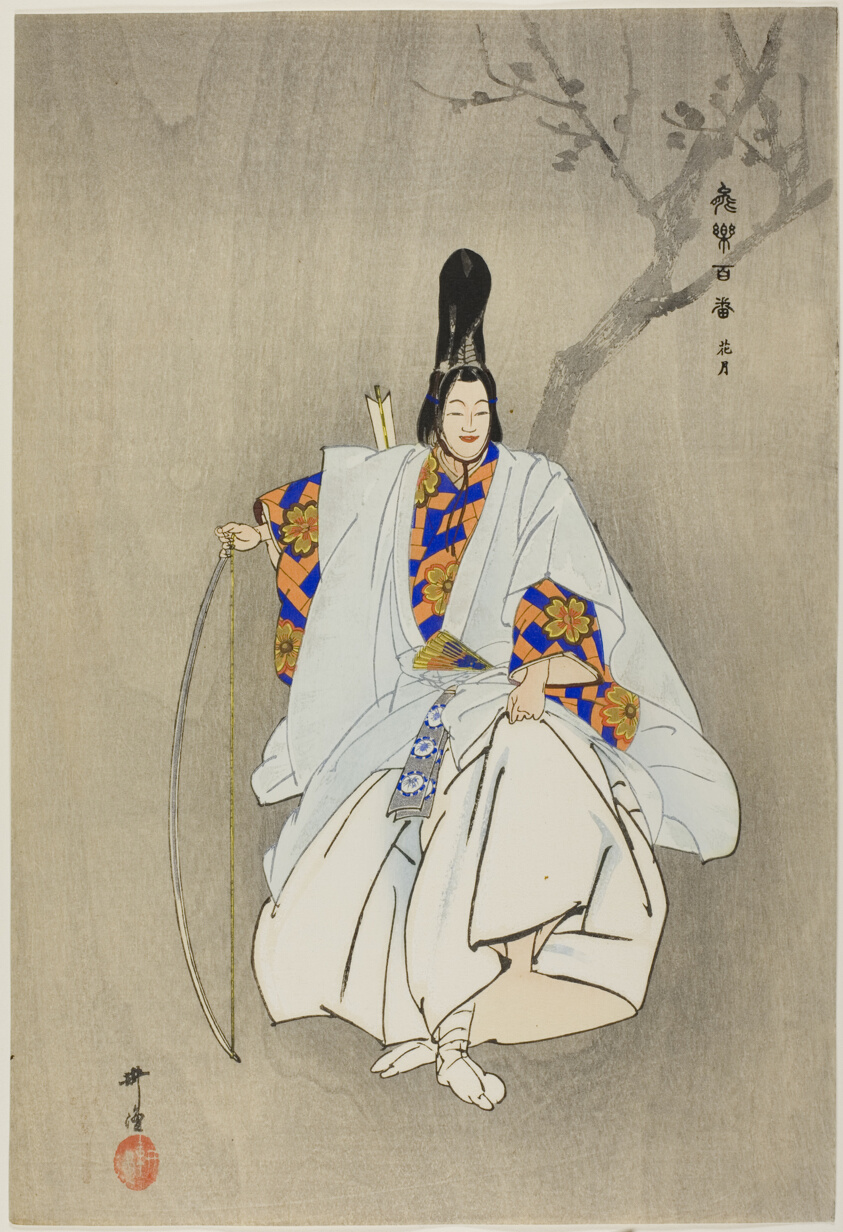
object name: Print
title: Kagetsu, from the series "One Hundred No Dramas (Nogaku hyakuban)"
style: Japanese (culture or style)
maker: Tsukioka Kogyo; Japanese, 1869-1927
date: 1898/1903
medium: Color woodblock print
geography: Japan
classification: woodblock print; print; asian art